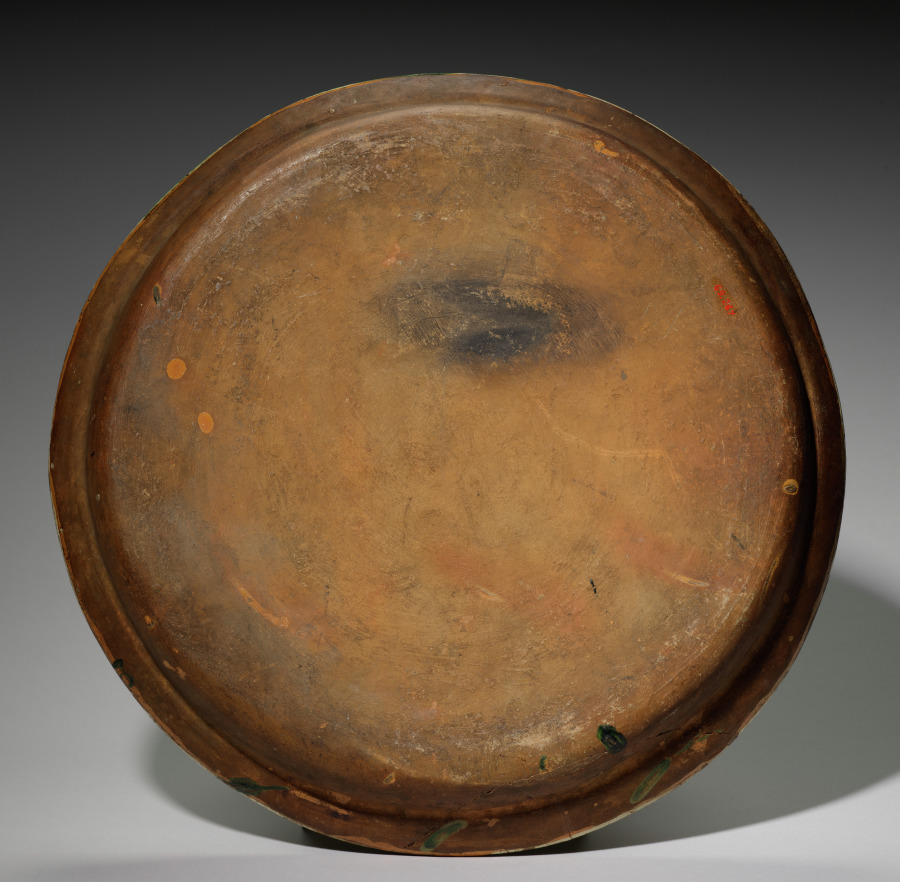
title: Plate: Majolica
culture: Mexico, 18th century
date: 1700s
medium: tin-glazed earthenware (maiolica)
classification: Ceramic